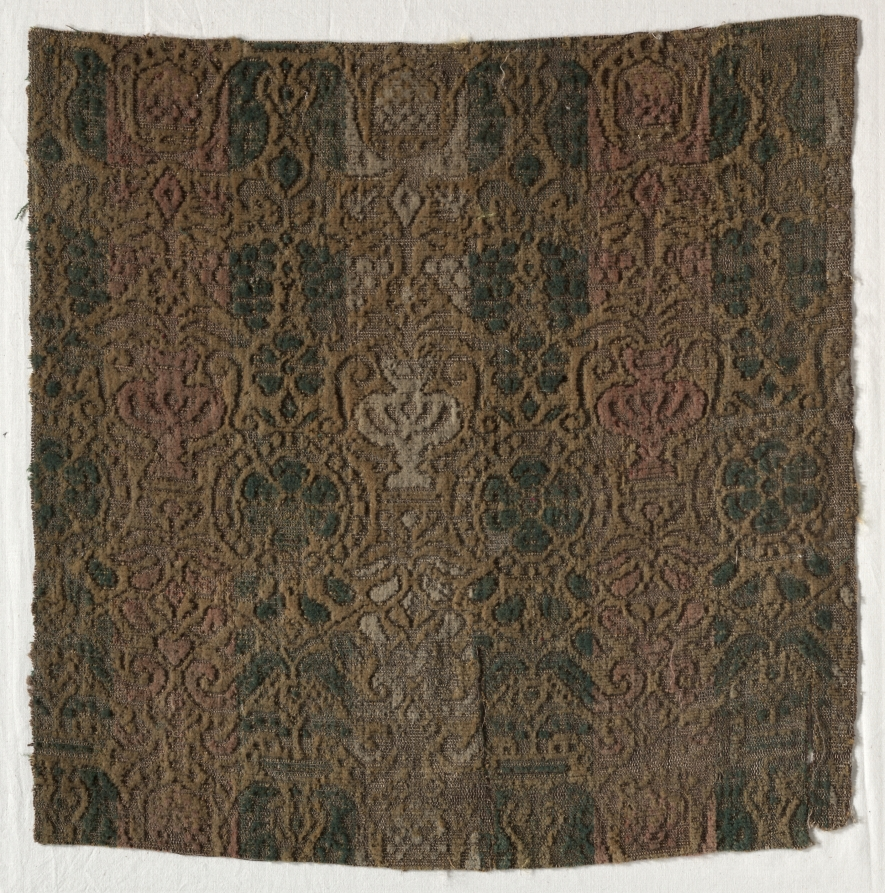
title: Velvet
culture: France, 17th century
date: 1600s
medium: velvet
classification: Velvet